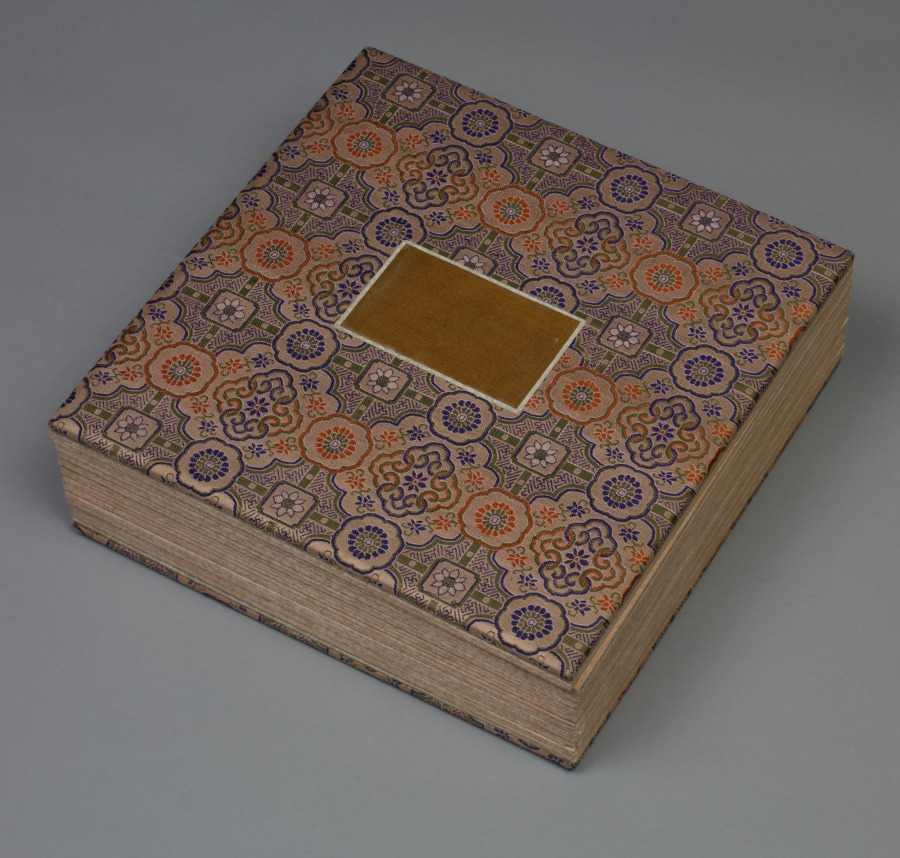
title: Album of Textile Samples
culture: Japan and China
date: 1700s–1800s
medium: silk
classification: Textile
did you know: This album contains 46 pages with 156 mounted Chinese or Japanese textile samples.